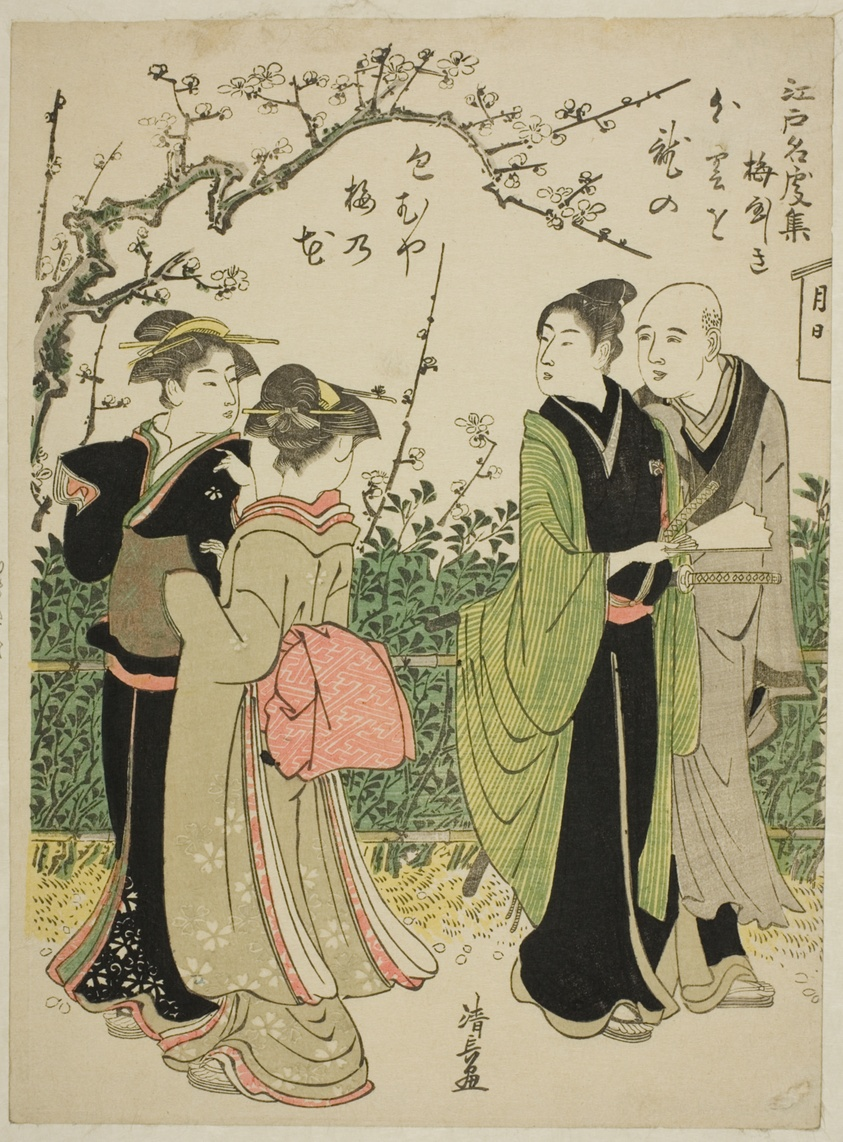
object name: Print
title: Umeyashiki, from the series "Collection of Famous Places in Edo (Edo meisho shu)"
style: Japanese (culture or style)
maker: Torii Kiyonaga (Japanese, 1752-1815)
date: c. 1782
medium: Color woodblock print; chuban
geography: Japan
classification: woodblock print; print